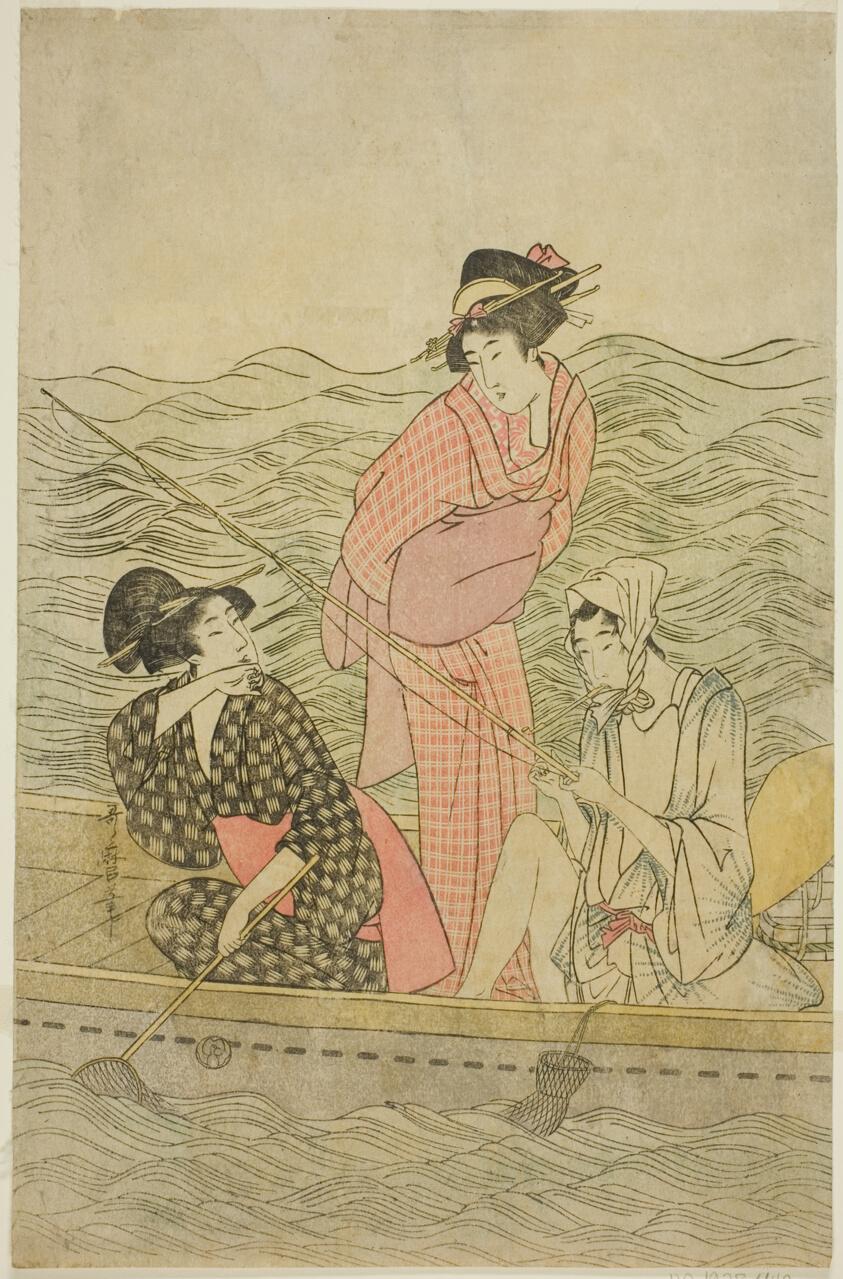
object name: Print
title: Fishing Excursion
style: Japanese (culture or style)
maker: Kitagawa Utamaro 喜多川 歌麿; Japanese, 1753 (?)-1806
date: c. 1799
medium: Color woodblock print; right sheet of aiban triptych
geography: Japan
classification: woodblock print; print; asian art